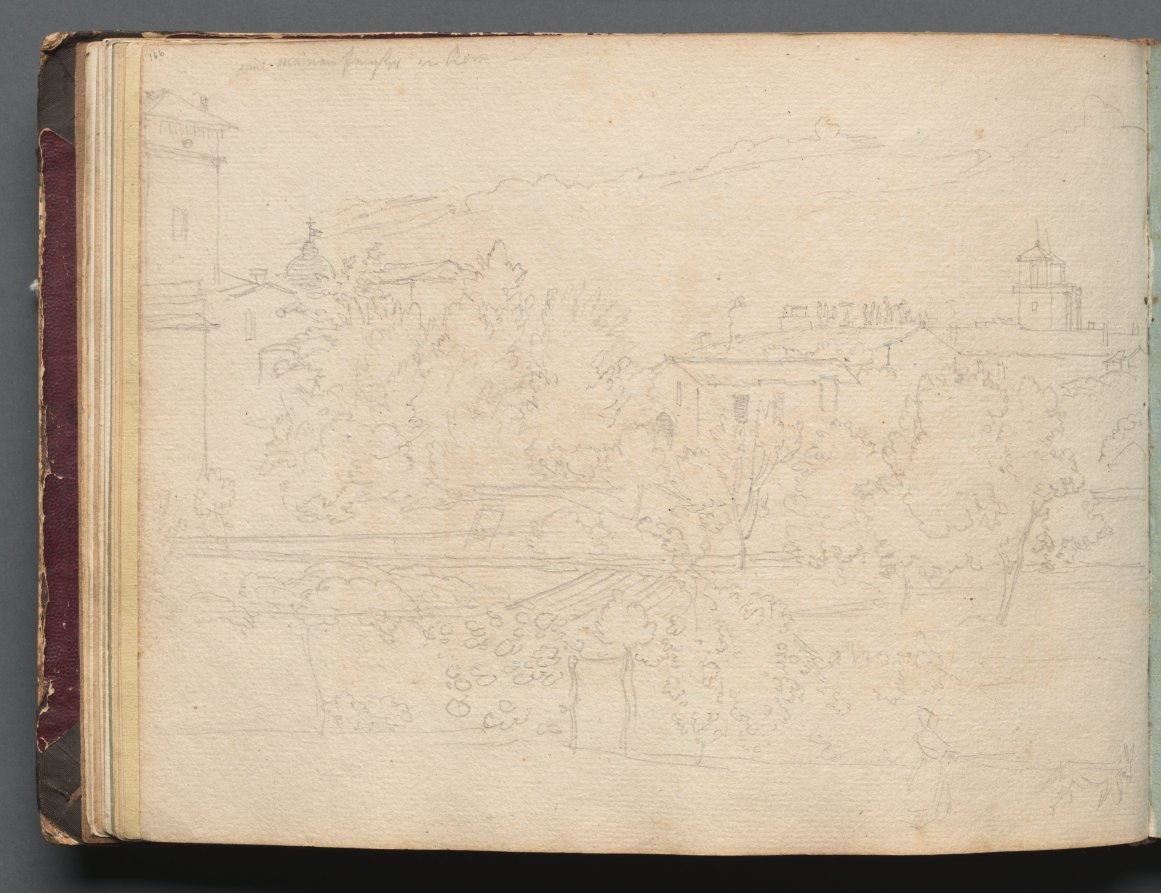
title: Album with Views of Rome and Surroundings, Landscape Studies, page 16b: Roman View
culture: Germany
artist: Franz Johann Heinrich Nadorp (German, 1794–1876)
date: c. 1830s-70s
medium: graphite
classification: Bound Volume